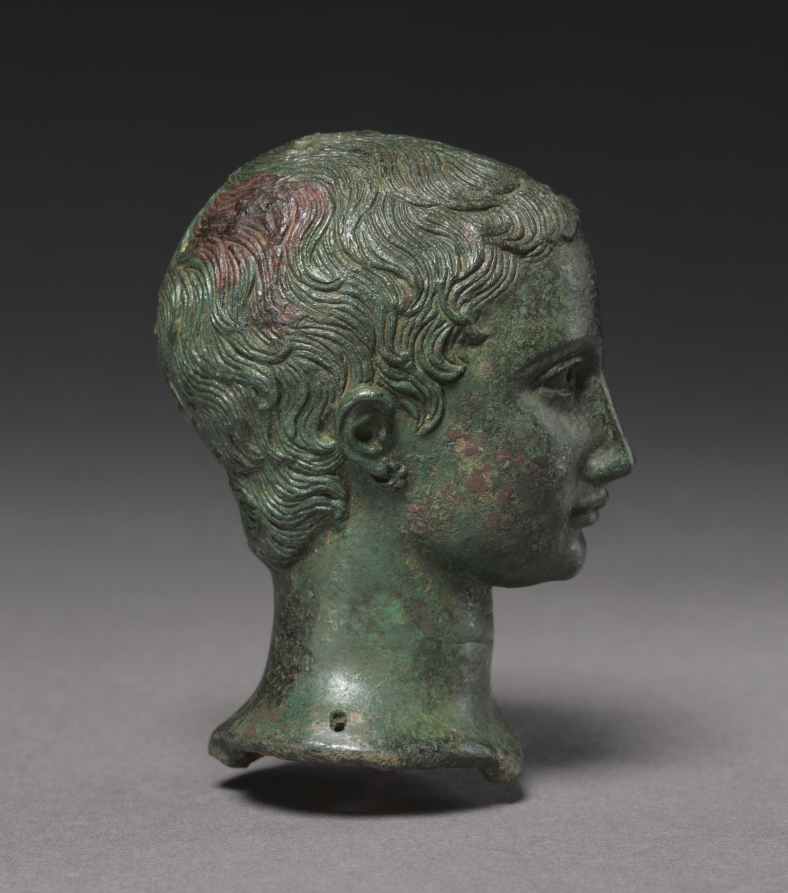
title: Portrait of a Young Girl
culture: Italy, Eastern Roman Empire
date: c. 25–30 CE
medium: bronze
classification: Sculpture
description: This bronze portrait has a boyish close-cropped hairstyle and rounded forehead. The irises of the eyes are now hollow but were once inlaid with material, possibly glass. The head was likely set into a body or bust and placed inside a tomb. This portrait head is distinctive for the particular arrangement of the comma-shaped locks of hair, which resembles portraiture during the later period of the reign of Tiberius (AD 25–30), a Julio-Claudian emperor. Some scholars believe that the earrings identify the figure as an Armenian prince, while others believe this to be a portrait of a young girl.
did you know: The earrings this young girl wears are similar to a pair in the CMA collection (1985.174).